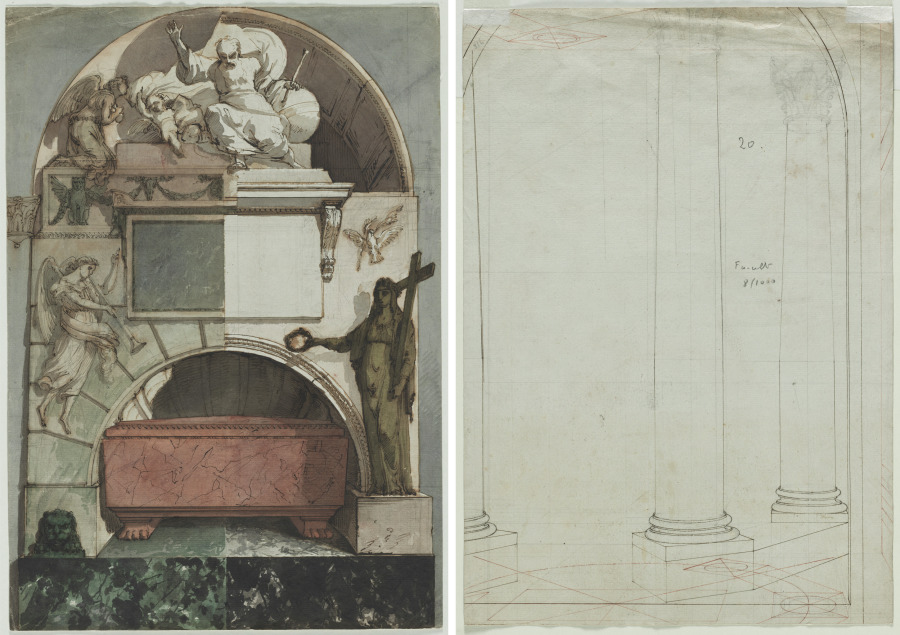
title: Design for a Fresco of an Artist's Tomb in the Certosa of Bologna (recto); Architectural Drawing of Columns (verso)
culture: Italy, 19th century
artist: Pietro Fancelli (Italian, 1764–1850)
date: c. 1810–1820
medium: pen and brown ink and watercolor with graphite under drawing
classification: Drawing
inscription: Verso, upper right, in graphite: "316" verso, in graphite: "20 Fancelli (?) 8/1000"